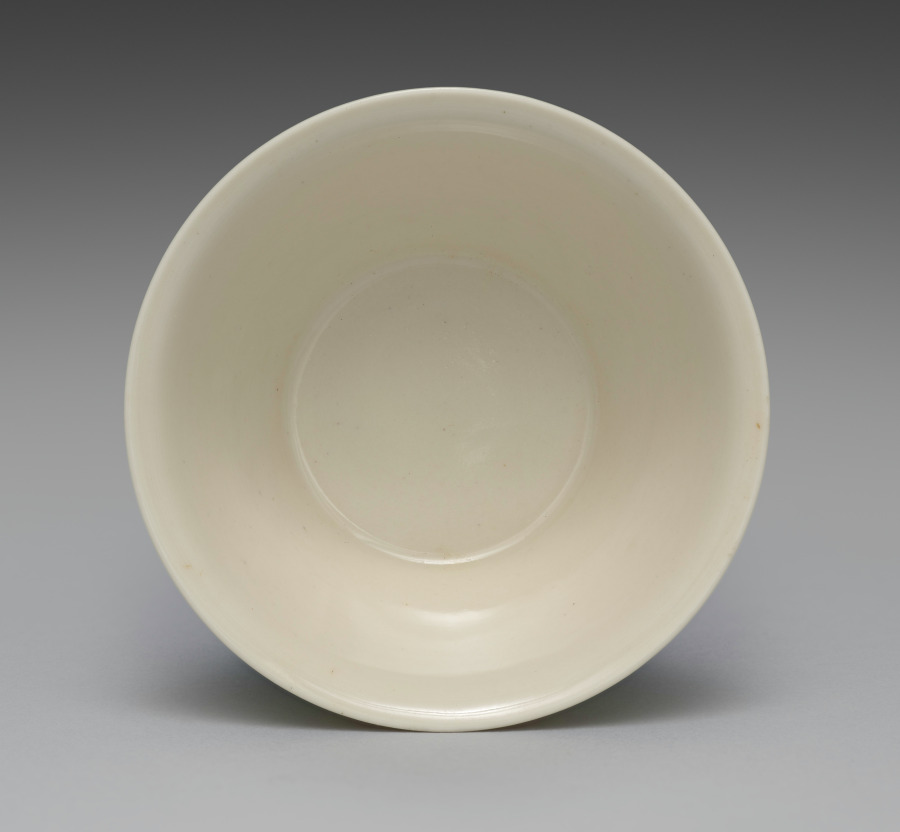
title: Teacup from Teacups with Floral Band Motif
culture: Japan, Meiji period (1868–1912)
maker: Seifū Yohei III (Japanese, 1851–1914)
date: 1893–1914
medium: One from a set of five cups; porcelain with incised decoration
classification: Ceramic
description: The five sencha teacups in this set are decorated with incised flowers and dots between a double band at the top and a single band at the bottom. They are in Yohei III’s creamy taihakuji body and glaze. In their motifs, they are quite similar to an incense burner by Yohei III (see CMA 2022.180), but the flowers are even more simple in design, with no open circle at the center. A label affixed to the side of the box refers to them as “sencha cups in emulation of Korean white [ware].” The reference to Korean ware indicates that even though Yohei was more directly inspired by Qing-dynasty wares from the Dehua kilns in Fujian Province in developing his porcelain clay and glaze for works such as these, the general understanding of the continental models still placed them, at least in terms of color, among pieces broadly associated in Japan with Korean white wares. The delicate cups are thinly potted, so they have a highly desirable translucency.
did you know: The delicate cups in this set are thinly potted, so they have a highly desirable translucency.